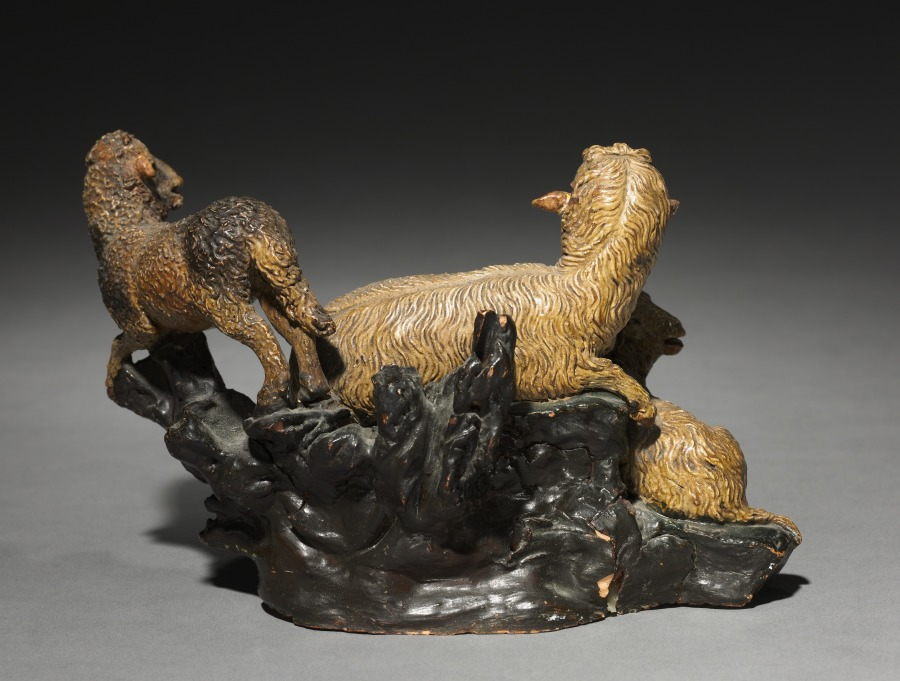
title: Figure from a Crèche: Group of Four Sheep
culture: Italy, Naples, late 18th-early 19th century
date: 1780–1830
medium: painted terracotta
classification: Sculpture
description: The practice of creating scenes of the Nativity for the home dates from the early 1700s in Italy, where people began to set up doll-like figures of about a foot or less in height. The custom was particularly popular in Naples around 1800, where crèche scenes (crèche means cradle, or crib) included many figures, whose heads and hands of painted terracotta, stuffed cloth bodies, and clothing adapted from contemporary local costumes gave them an amazingly realistic character. Representations of the birth of Jesus can be traced to the first few centuries of Christianity. Both living creatures and sculptural depictions of them were used from early times. By the late middle ages it was customary to create life-size figures of wood or stone, naturalistically painted, to represent the characters who participated in the events of Jesus's early life. These sculptures were then arranged in scenes illustrating one or both of the most important of these events, the Adoration of the Shepherds and the Adoration of the Magi-the three kings from the East who came to pay homage to the Christ child. Used in churches, these large figures were especially popular in Italy, Central Europe, Spain, and Portugal.